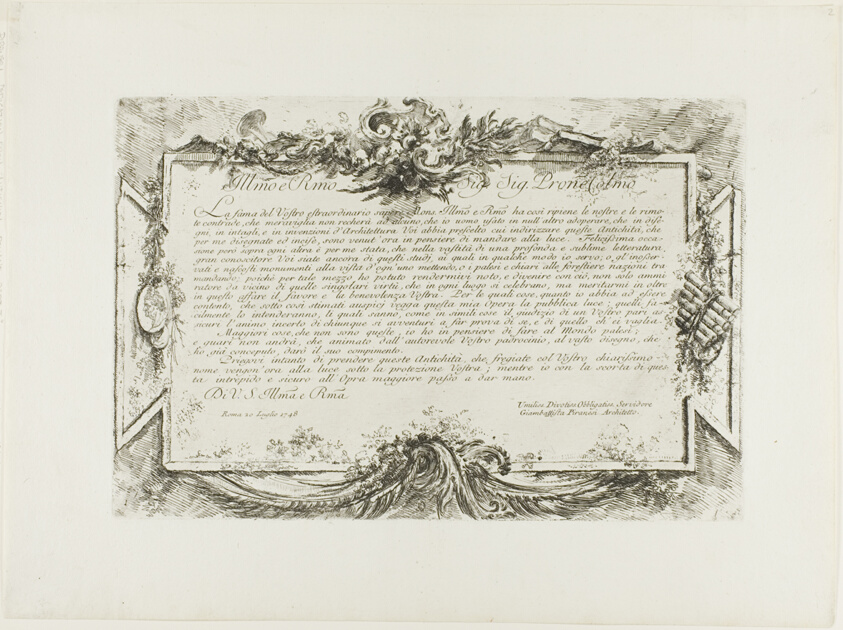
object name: Print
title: Dedication to Giovanni Bottari, from Some Views of Triumphal Arches and other monuments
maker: Giovanni Battista Piranesi (Italian, 1720-1778)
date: 1748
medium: Etching on ivory laid paper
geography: Italy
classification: etching; print; prints and drawing